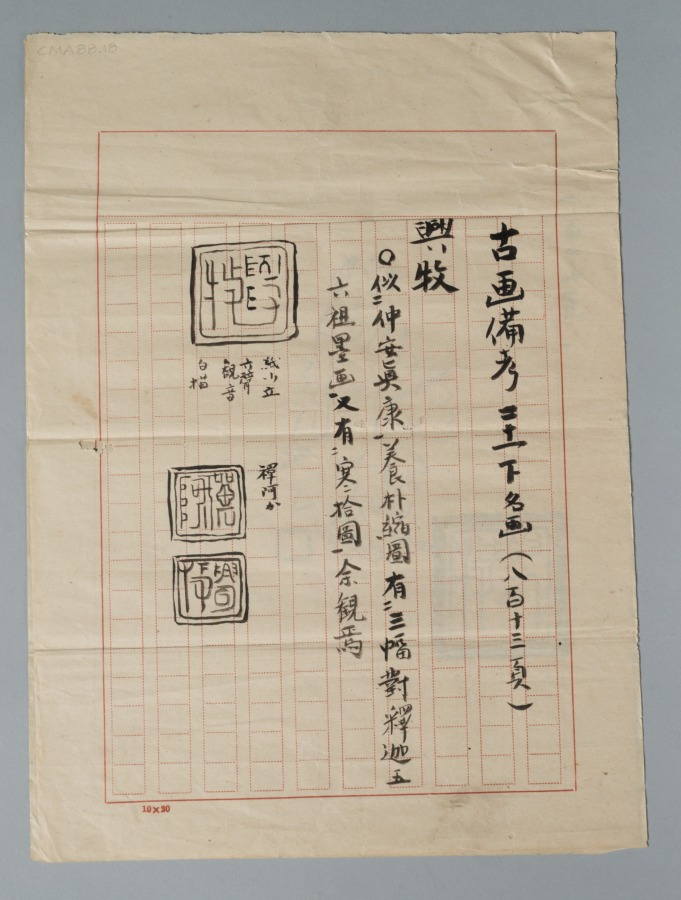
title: Female Daoist Figure in Landscape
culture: Japan, Muromachi period (1392–1573)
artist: Kōboku (Japanese)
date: early 1500s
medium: hanging scroll; ink on paper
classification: Painting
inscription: 「興牧」（朱文方印）